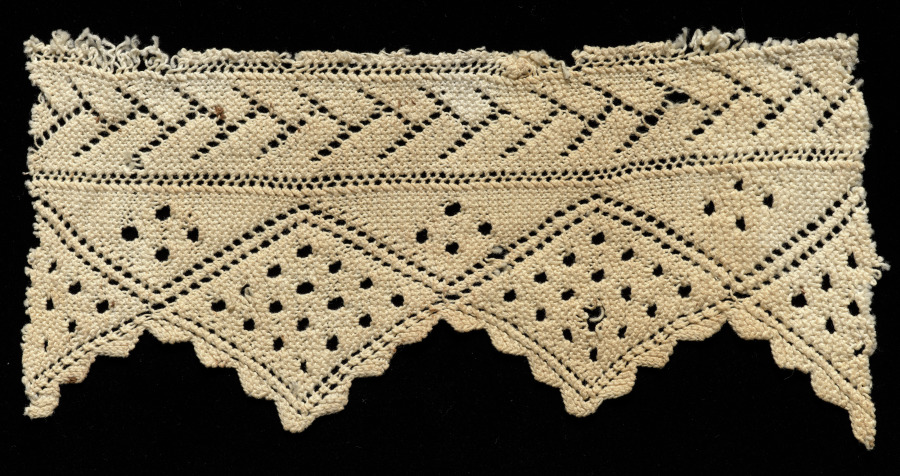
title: Lace Edging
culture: Spain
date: 1800–1840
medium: Knit lace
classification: Lace